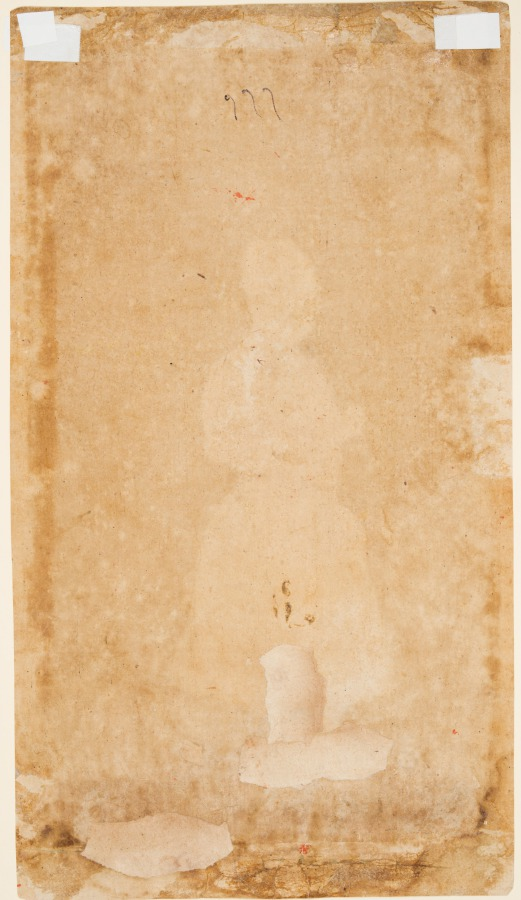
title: Raja Hari Sen of Mandi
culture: Northern India, Pahari kingdoms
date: c. 1650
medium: Gum tempera, ink, and gold on paper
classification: Painting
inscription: 111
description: In the portrait, the raja is depicted clad in a gheradar jama tied with a short-length pataka, a feature of Jahangir-era fashion. He stands confidently against a monochromatic fern green backdrop, with his left hand supporting his sword in a mauve sheath while his right hand reaches toward his dagger securely tucked in his belt.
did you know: Raja Hari Sen adorns a Jahangir-style turban which was out of imperial fashion at the time of portraiture